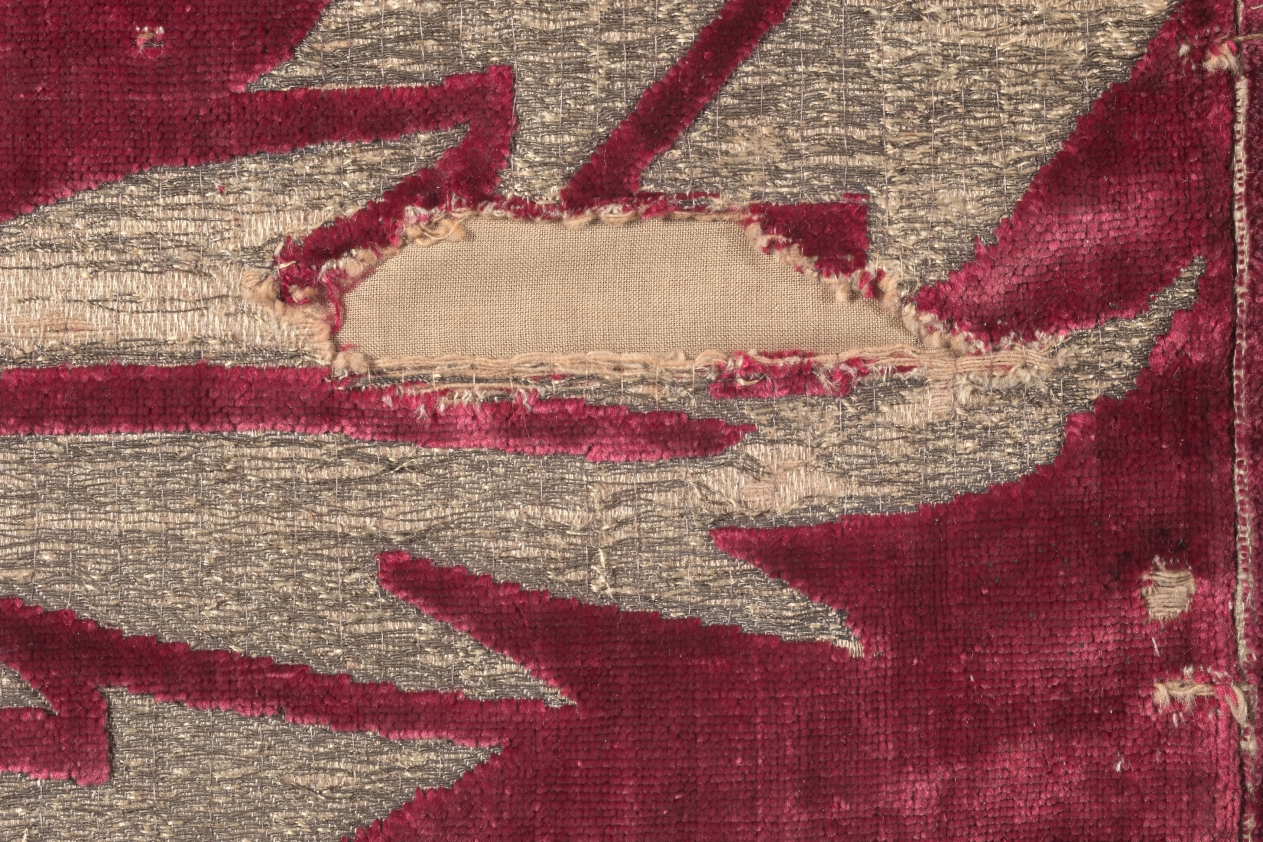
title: Brocaded Velvet Panel with Italianate Pattern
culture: Turkey, Istanbul or Bursa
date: 1575–1625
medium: Silk: velvet, brocaded; gilt-metal thread and cotton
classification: Velvet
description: Rarely are four fabric widths preserved together from any culture. This gilt-metal thread pattern combines Turkish and Italian features: the large ogival (curved) lattice clasped by crowns and the velvet structure are Turkish, and the two so-called artichoke designs are enlarged adaptations of Italian motifs. A symbol of wealth and power, this velvet panel was woven during the artistic height of the Ottoman Empire in the late 1500s. It may have covered a divan (sofa) or possibly enhanced a wall during cold winters in the imperial Topkapi Palace in Istanbul.